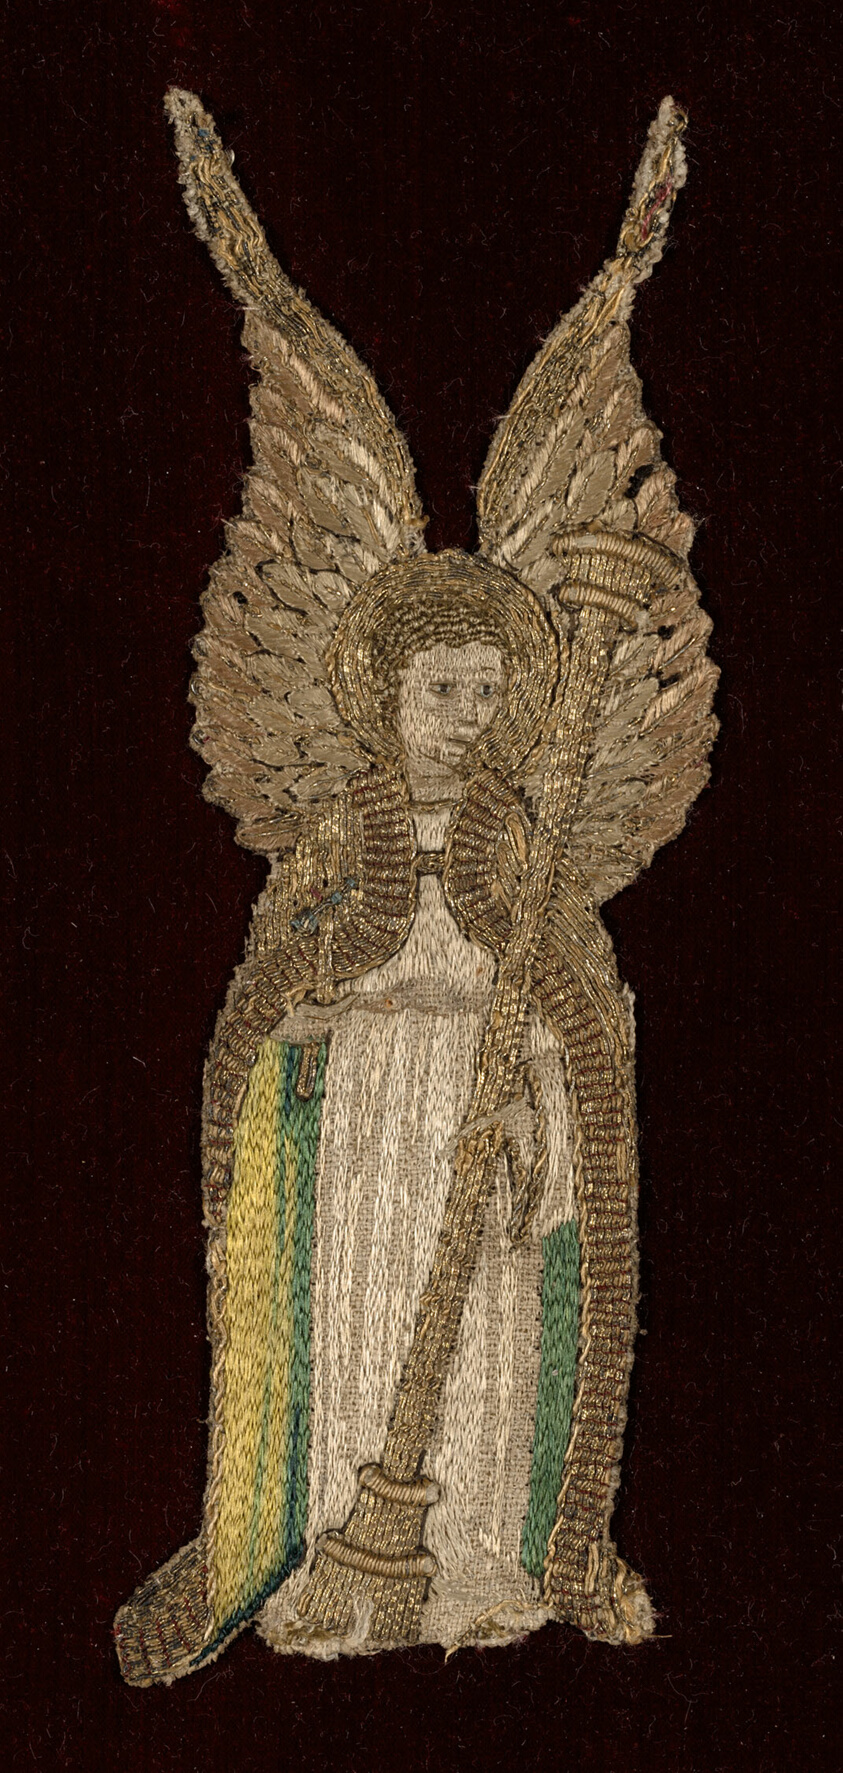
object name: Textile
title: Fragment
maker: England, France,or Italy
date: 15th century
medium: Linen, plain weave; embroidered with silk and gilt-metal-strip-wrapped silk in overcast, satin, split, and twined double running stitches; laid work, couching, and padded couching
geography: England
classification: textile; needlework (visual works)